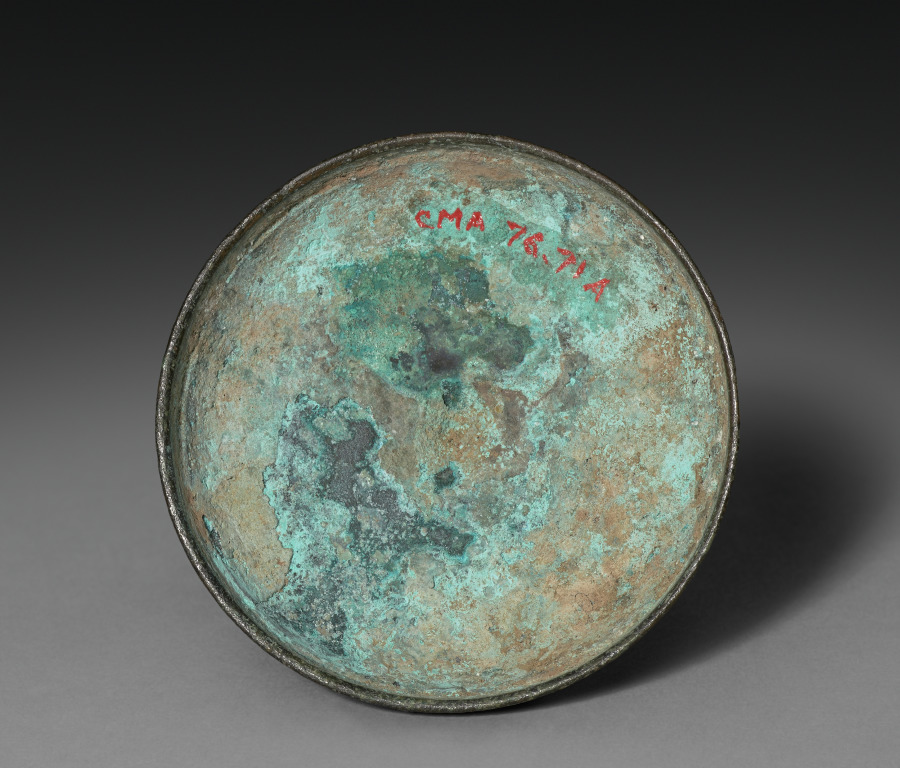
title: Reliquary Box (lid)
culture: Pakistan, Gandhara, probably Swat, late Kushan period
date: 200–400 CE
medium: bronze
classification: Metalwork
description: This casket in bronze represents the great variety of reliquary caskets. It is round, has a low foot, and is covered with a lid (with raised handle) that fits over the vessel rather than being inset. It is a traditional shape frequently encountered in Gandharan reliquaries, but its slight flattening and elaborate decoration imply a slightly late date. A central band of a floral creeper decorates the main body of the box and its lid, and is framed on both sides by narrower fluted bands. This type of freehand design is characteristic of the late Kusana-early Gupta period. Similar floral patterns are found in another CMA object (1972.164), the lid of a box showing combat between a man and a lion, which also dates to a later period. There the design fills the vacant areas in the busy composition. This pattern, however, has its antecedents in the Begram ivories . which, according to most sources, pre-date the Sasanian invasion of the mid-third century AD. Therefore, it can be assumed that this type of floral decoration was already in use in the third century and that this reliquary box probably dates to the third-fourth century AD. The bronze alloy, in its somewhat silverish-metallic appearance, seems to be very close to the material used in the Swat bronzes, which suggests that Swat may also be the provenance for this reliquary.